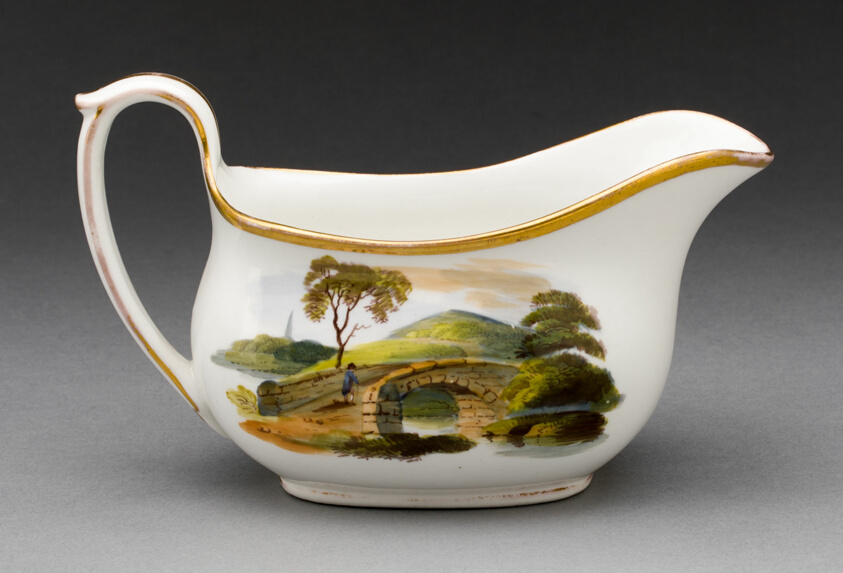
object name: Ceramics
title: Creamer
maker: Wedgwood Manufactory (England, founded 1759)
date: c. 1815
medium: Porcelain with polychrome enamels and gilding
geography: Burslem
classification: teaware; porcelain; european decorative arts; ceramics